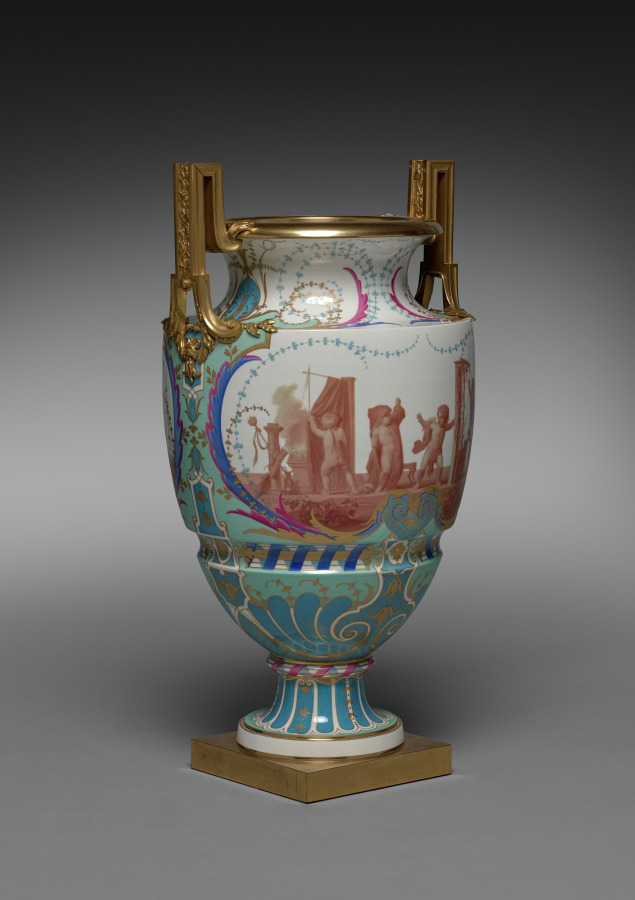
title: Vase, Feuille d'Eau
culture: France, Sèvres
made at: Sèvres Porcelain Factory (French, est. 1756)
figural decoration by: Paul Marie Roussel (French, 1804–1877)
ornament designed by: Emile Renard (French)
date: 1858–62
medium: porcelain with gilt bronze mounts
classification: Ceramic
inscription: figural paintings signed obverse and reverse: "PMROUSSEL INV & PIN"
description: Feuille d'Eau means "waterleaf" and refers to the name given to the shape of this vase at the Sèvres factory. In English, waterleaf is the common name for a plant with bell-shaped flowers. The term is also applied to a stylized plant motif used in Graeco-Roman ornament. This vase was exhibited by the Sèvres firm at the International Exhibition held in London in 1862.